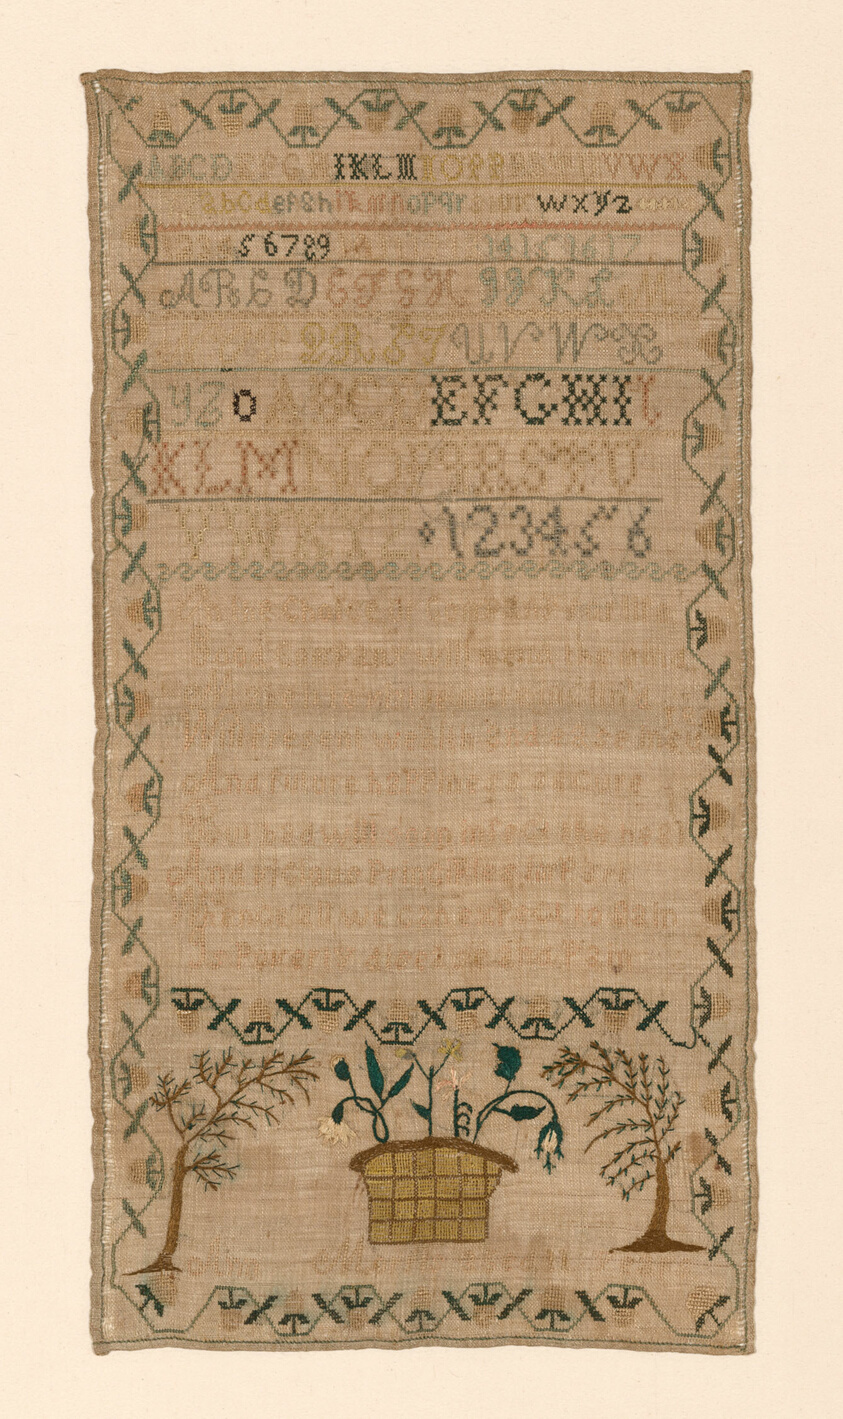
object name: Textile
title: Sampler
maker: Ann Morris (American, active c. 19th century); United States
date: 19th century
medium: Linen, plain weave; embroidered with silk in chain, cross, eyelet, hem, satin and single satin stitches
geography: United States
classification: textile; needlework (visual works); sampler